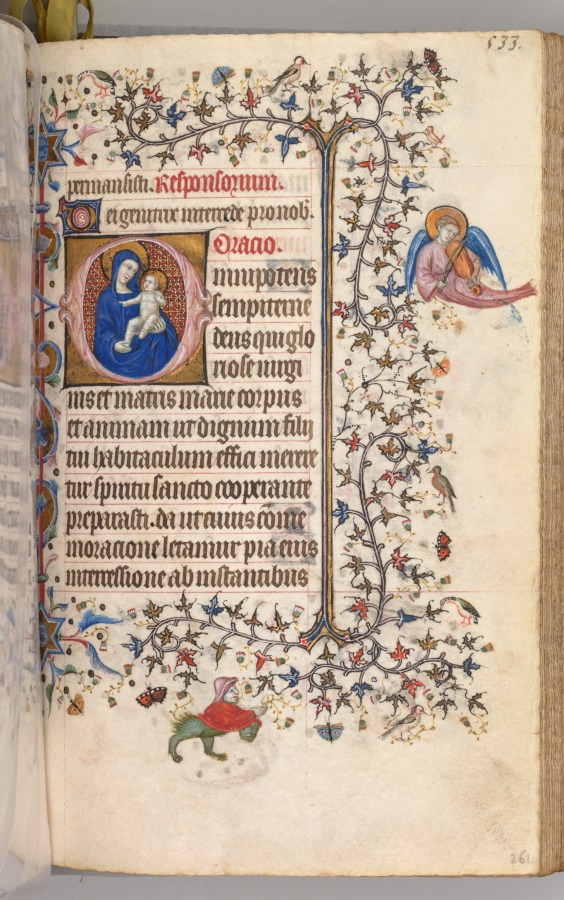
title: Hours of Charles the Noble, King of Navarre (1361-1425): fol. 261r, Virgin and Child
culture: France, Paris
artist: Master of the Brussels Initials and Associates (French)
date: c. 1405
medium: ink, tempera, and gold on vellum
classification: Bound Volume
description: This precious volume was obviously highly prized by its owner, the French-born King of Navarre, who had his coat of arms painted on no less than twenty folios. Rather than directly commissioning this manuscript from a specific workshop, it seems that Charles the Noble acquired his book of hours -- perhaps ready-made for the luxury market -- while on a trip to Paris in 1404-05. A collaborative effort, six painting styles are evidenced within the pages of this codex, those of two Italians, two Frenchmen, and two Netherlanders. The painter who was responsible for the planning and decoration of the book, and who produced seventeen of the large miniatures, was a Bolognese artist known as the Master of the Brussels Initials. His principal assistant, responsible for most of the borders, was a Florentine who signed his name "Zecho" da Firenze on folio 208 verso.